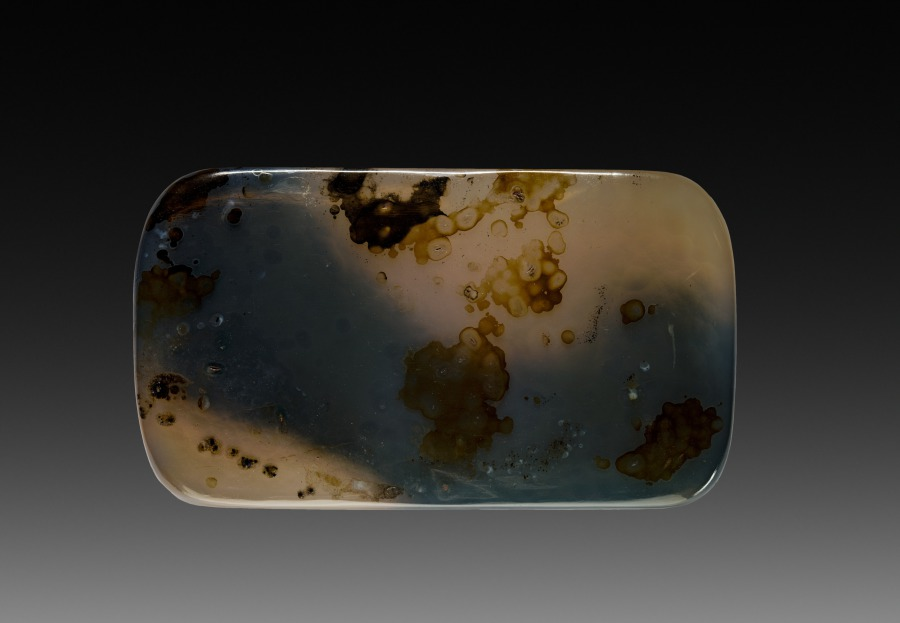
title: Buckle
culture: China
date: 1900s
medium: agate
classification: Jewelry